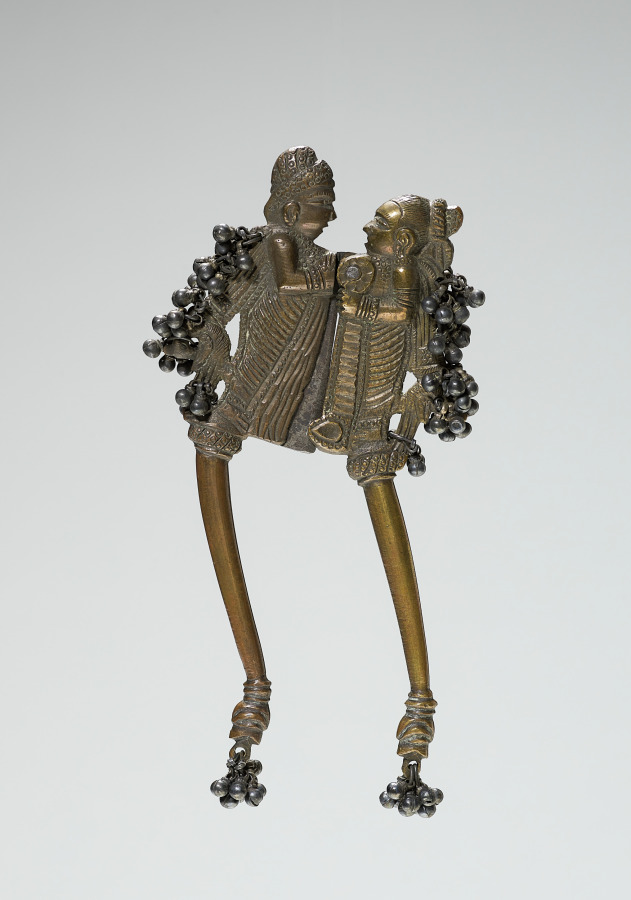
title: Betel Nut Cutter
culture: Siam, 19th century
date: 1800s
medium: porcelain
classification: Metalwork